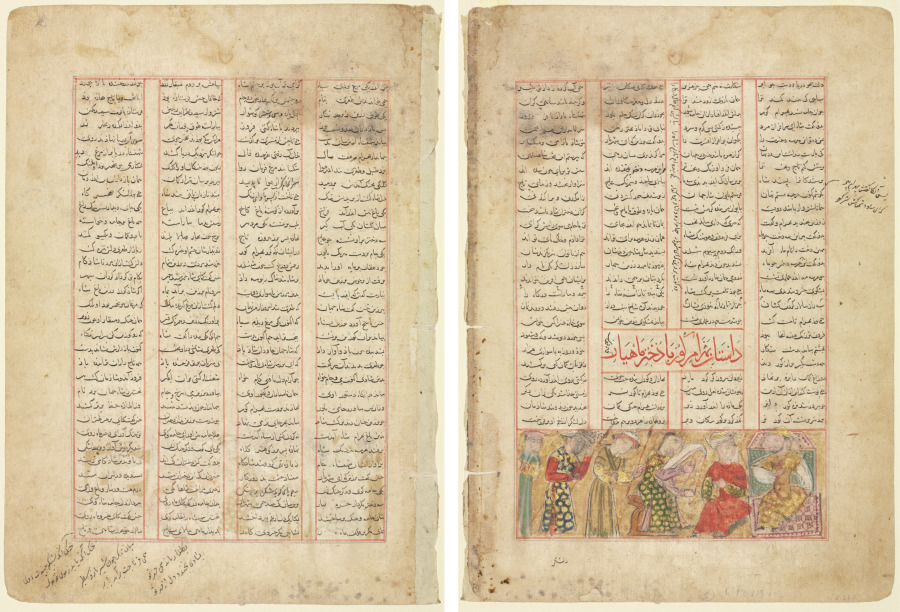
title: Text Page, Persian Verses (recto); Bahram Gur meets Arzu, the Daughter of Mahiyar (verso)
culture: Iran, Shiraz, Inju Period, 14th Century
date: c. 1350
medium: ink and opaque watercolor on paper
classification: Manuscript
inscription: script: Naskh